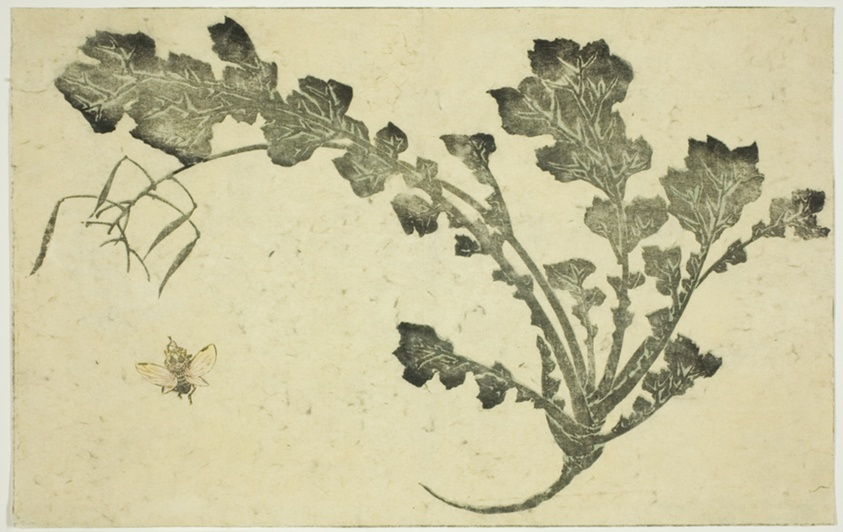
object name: Print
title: Wasp and turnip stalk, from "The Picture Book of Realistic Paintings of Hokusai (Hokusai shashin gafu)"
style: Japanese (culture or style)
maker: Katsushika Hokusai 葛飾 北斎; Japanese, 1760-1849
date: c. 1814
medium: Color woodblock print; double-page illustration from book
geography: Japan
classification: woodblock print; print; asian art